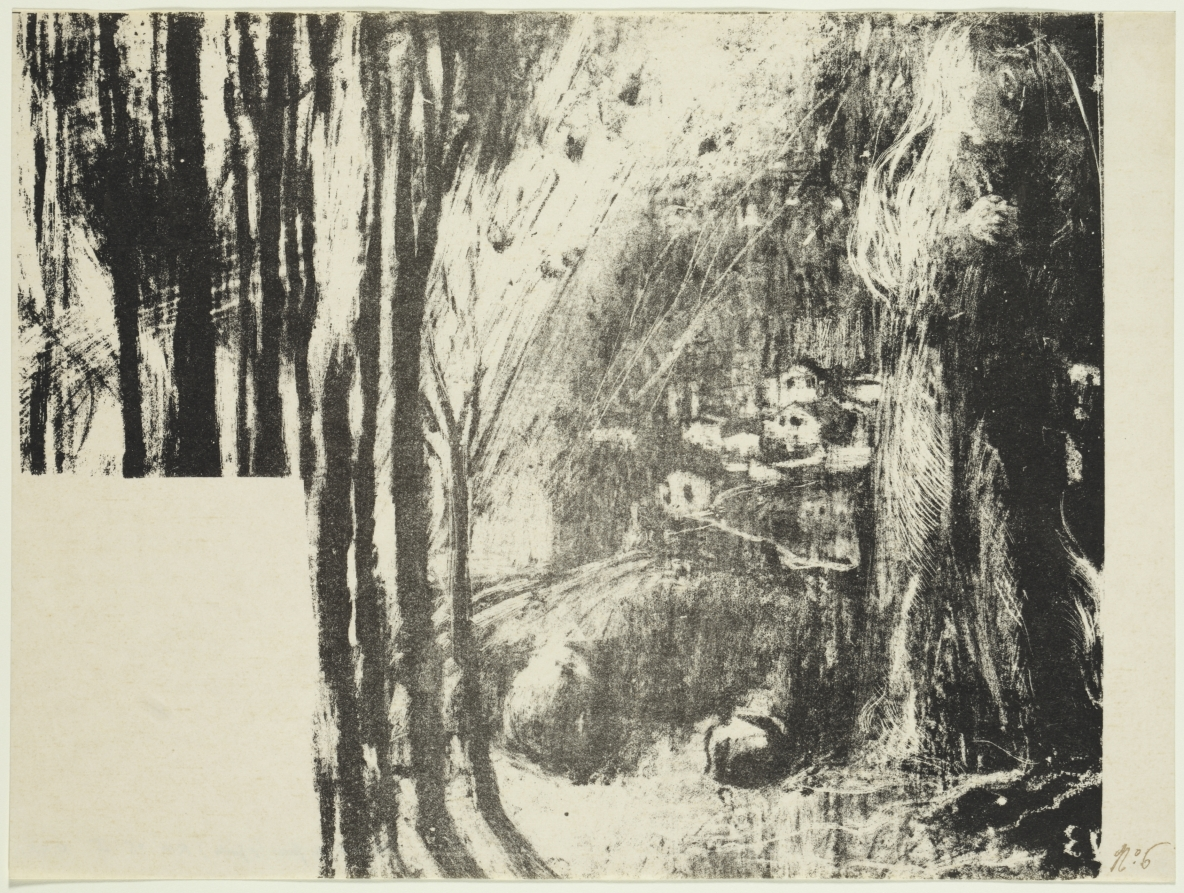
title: Beyond Human Forces (Part 2)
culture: France, 19th century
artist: Édouard Vuillard (French, 1868–1940)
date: 1897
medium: lithograph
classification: Print